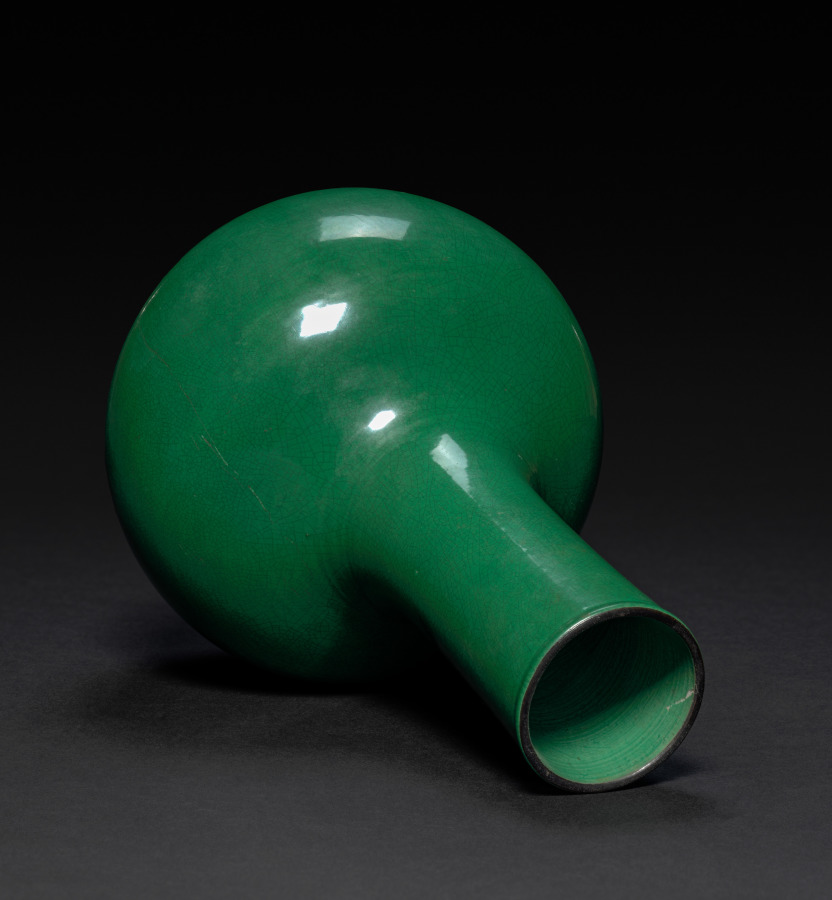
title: Bottle-shaped Vase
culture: China, Qing dynasty (1644–1911), Qianlong reign (1736–95)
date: 1736–95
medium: porcelain with green glaze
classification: Ceramic